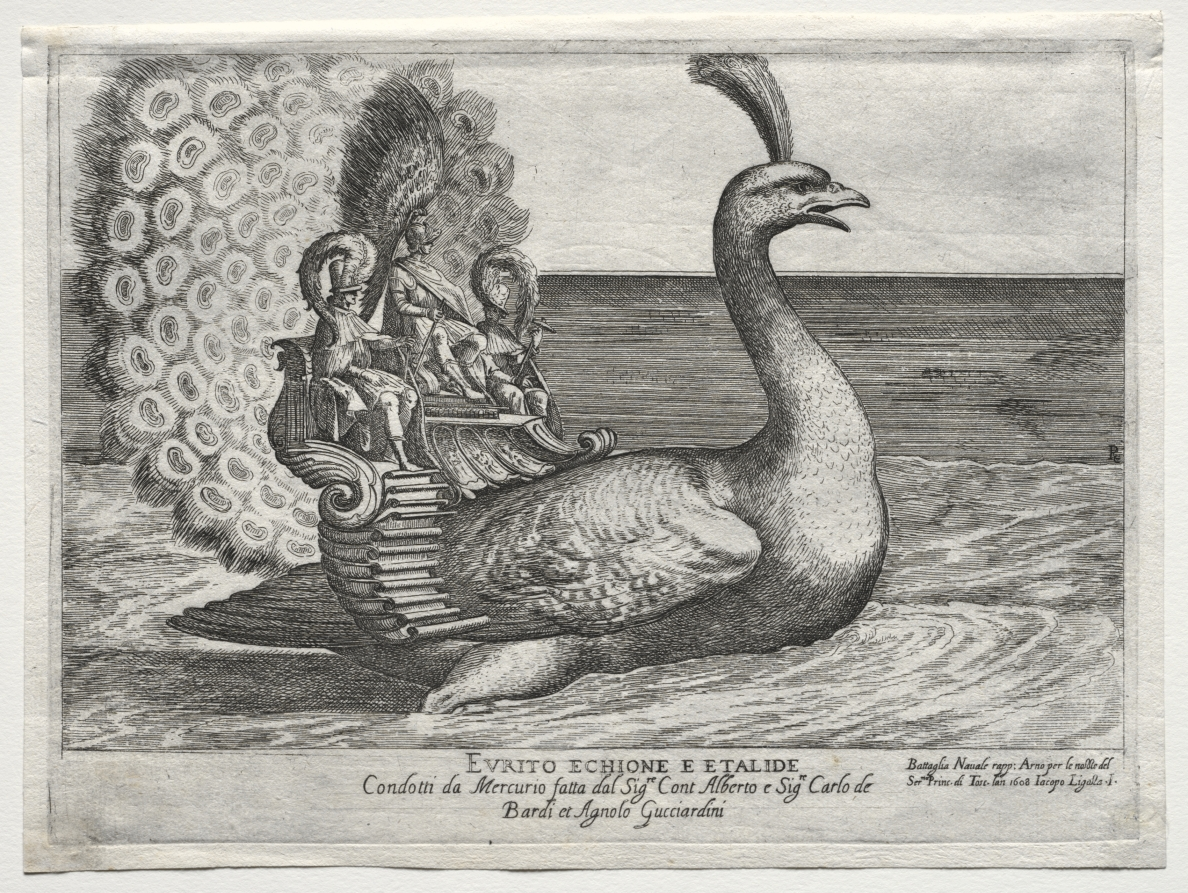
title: Naval Combat Represented on the Arno River in Florence, for the Marriage of Cosimo di Medici Prince of Tuscany, and Maria Maddalena of Austria, in 1608: Evrito Echione E Etalide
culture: Italy, 17th century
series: a set of 19 plates Bataglia Navale...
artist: Remigio Cantagallina (Italian, 1582/3–1656)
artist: after Jacopo Ligozzi (Italian, 1547–1626)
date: 1608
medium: etching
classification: Print